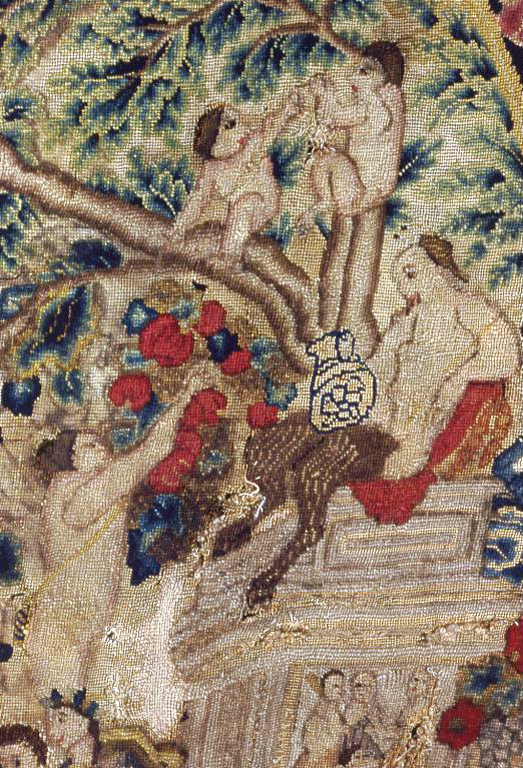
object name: Textile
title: Cardtable Cover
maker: England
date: 1725/1775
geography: England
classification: textile; needlework (visual works)